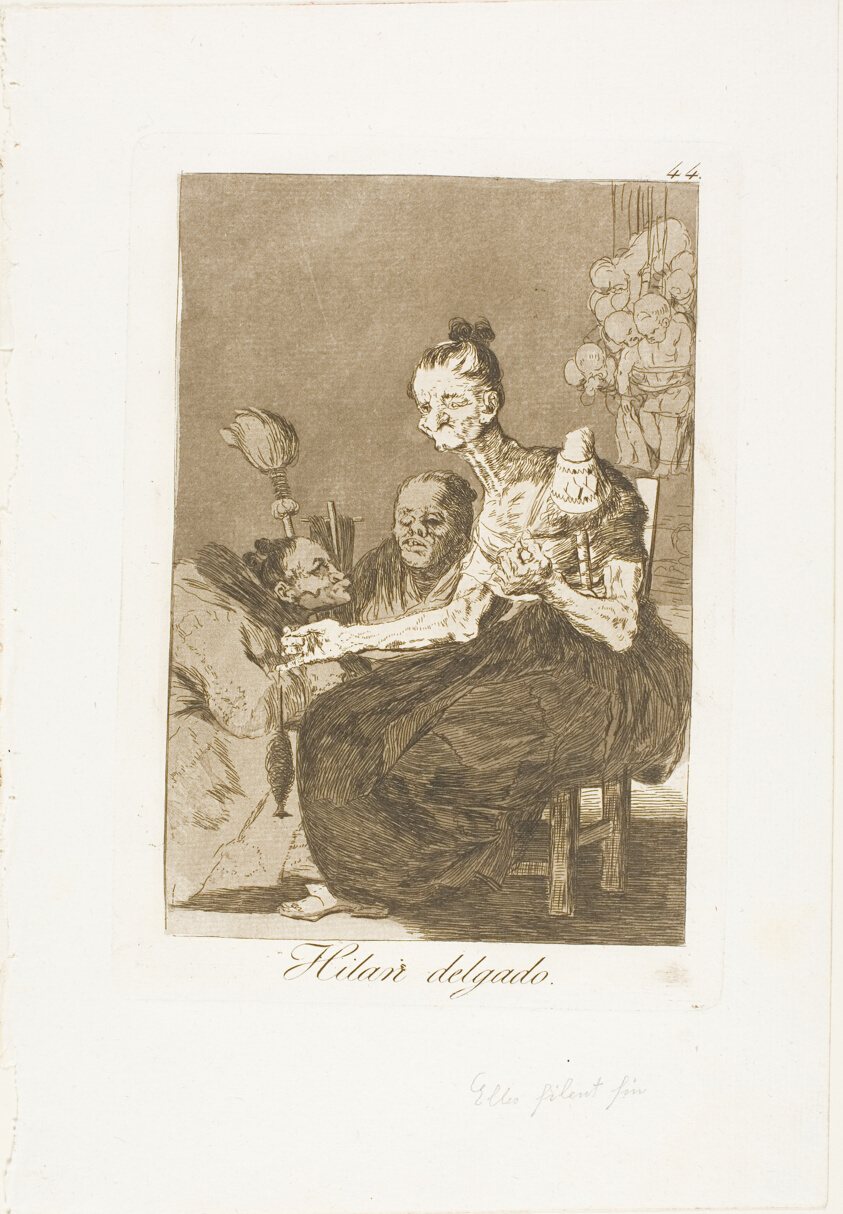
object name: Print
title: They Spin Finely, plate 44 from Los Caprichos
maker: Francisco José de Goya y Lucientes (Spanish, 1746-1828)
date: 1797/99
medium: Etching and aquatint on ivory laid paper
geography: Spain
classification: etching; print; prints and drawing